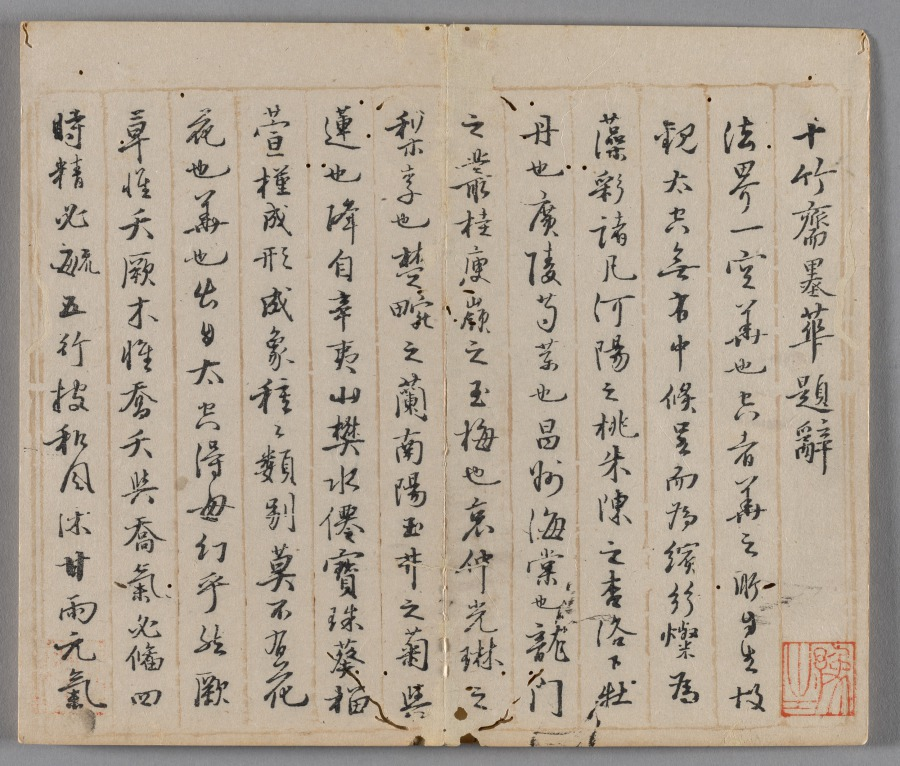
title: Ten Bamboo Studio Collection of Calligraphy and Painting: Round Fans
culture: China, Qing dynasty (1644-1911)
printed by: Hu Zhengyan (Chinese, c. 1584–1674)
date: 1633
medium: Woodblock-printed book; ink and colors on paper; first edition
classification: Print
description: Color printing reached a level of perfection in the early 1600s, as seen in this Ten Bamboo Studio Collection of Calligraphy and Painting and the Mustard Seed Garden Manual of Painting (printed 1679 and 1701). The painterly quality, precision in registering (aligning) the woodblocks, and harmonious colors made them the most successful color print editions in Chinese history. Both editions were printed and compiled in Nanjing, spread nationwide, and had a great impact on the arts in Japan and Korea.